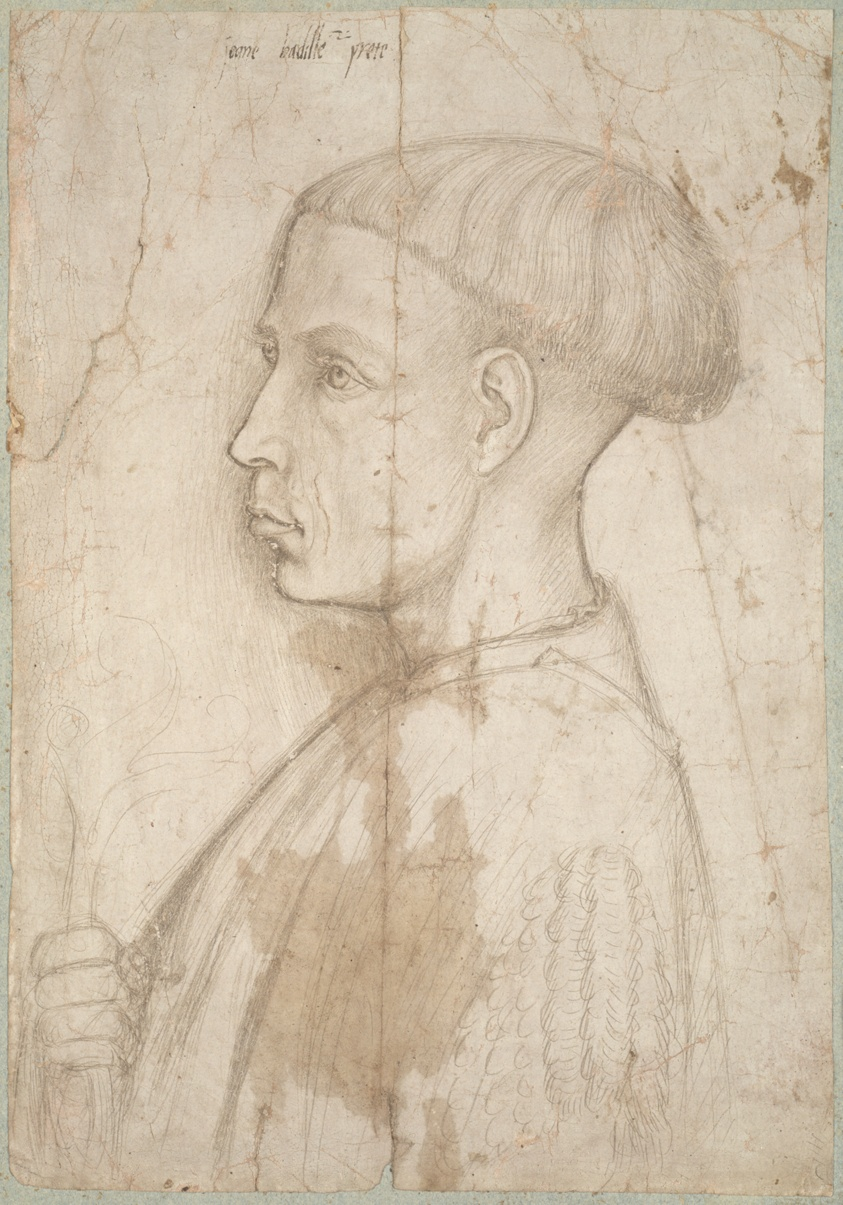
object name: Drawing and Watercolor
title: Bust of a Young Man in Profile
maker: Giovanni Badile (Italian, 1379-1448/1451)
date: 1430/40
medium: Metalpoint on cream laid paper, prepared with grayish white ground over red chalk wash ground, laid down on blue wove paper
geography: Italy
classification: metalpoint; drawings (visual works); prints and drawing